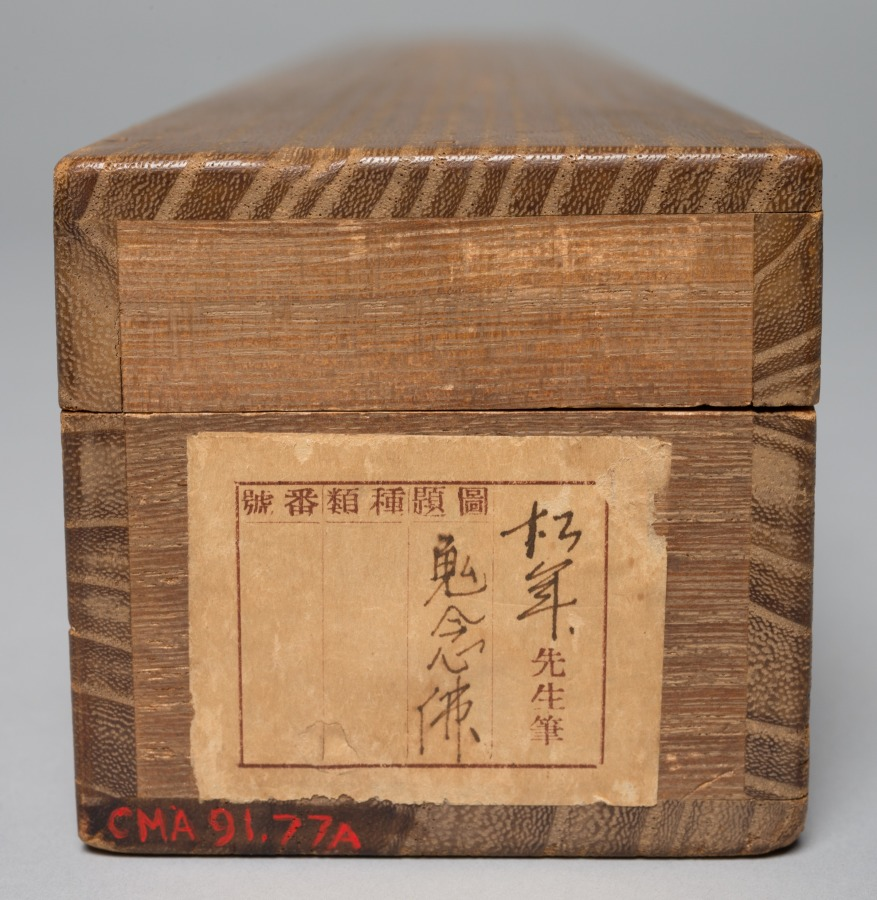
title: Demon Intoning the Name of the Buddha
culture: Japan, Meiji period (1868–1912)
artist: Suzuki Shōnen (Japanese, 1849–1918)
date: late 1800s–early 1900s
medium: hanging scroll; ink and color on silk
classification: Painting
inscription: artist's inscription, signature, and seal upper left.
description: Among the subjects of souvenir paintings made since the 1600s in Ōtsu, a travel hub near Kyoto in western Japan, was a demon in monk’s robes reciting the name of the Buddha Amida to the rhythm of his gong. Ōtsu paintings largely disappeared with the advent of rail travel in the late 1800s, as people no longer stopped in the area. In this work, Kyoto-based artist Suzuki Shōnen reimagined the demon for the modern era—the simple figure from the Ōtsu painting is transformed into a realistic one accompanied by a calligraphic meditation on its nature.